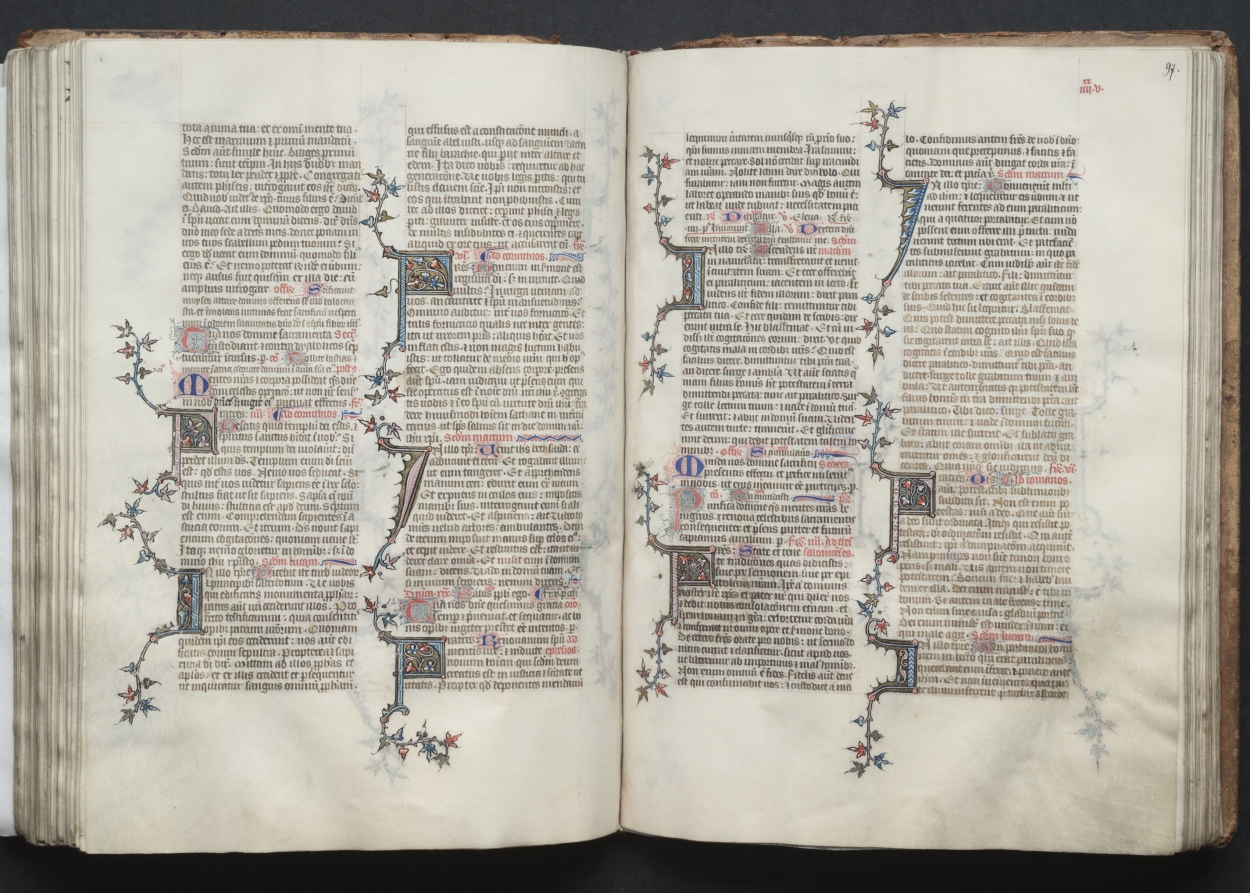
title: The Gotha Missal: Fol. 96v, Text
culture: France, Paris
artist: Master of the Boqueteaux (French)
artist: and Workshop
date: c. 1375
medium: ink, tempera, and gold on vellum; blind-tooled leather binding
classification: Bound Volume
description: The style and quality of this manuscript's decoration is typical of deluxe Parisian books made for aristocratic or royal patrons. Most of the book's decoration appears to be the work of the Master of the Boqueteaux, an artist active at the court of King Charles V (died 1380). His style was apparently shared by a number of book illuminators working in and around Paris. It is very possible that the Gotha Missal belonged to Charles V, but is not provable because the manuscript has no royal portraits and lacks a colophon. Given the book's magnificent decoration, however, it would seem that it was produced for a Valois prince, if not for the king himself. The manuscript receives its name from the German dukes of Gotha, its later owners.